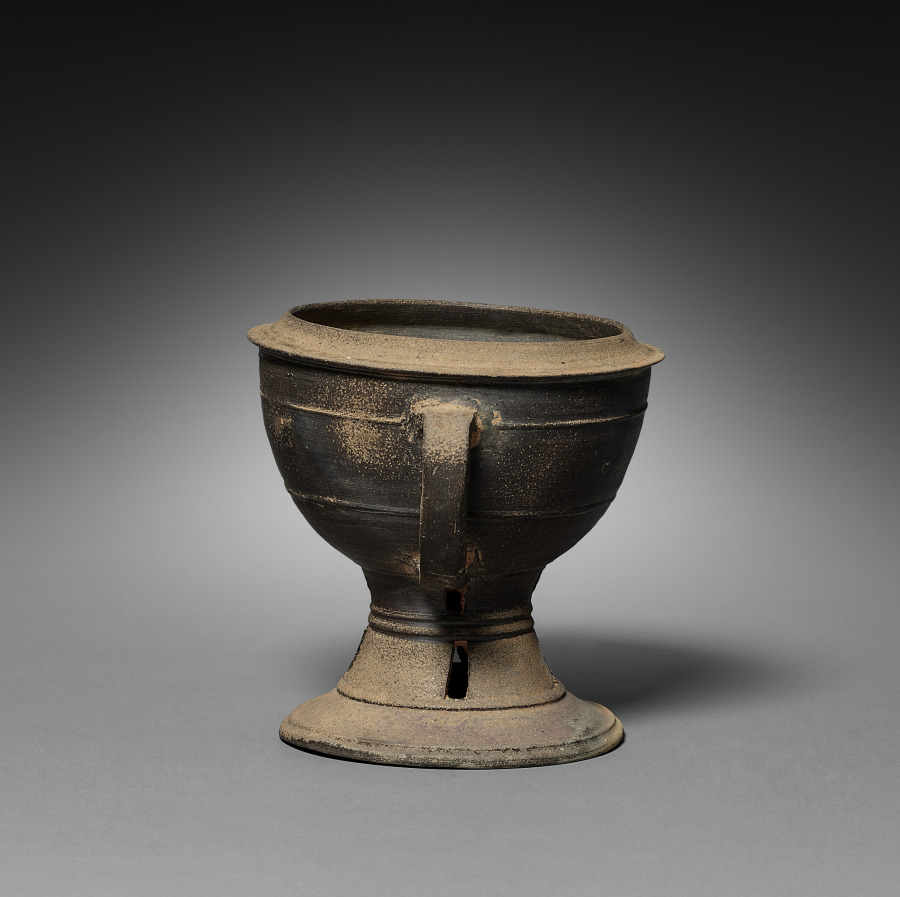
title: Lidded Cup with Strap Handles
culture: Korea, Gaya period (42–562 CE)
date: 300s–400s CE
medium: stoneware with natural ash glaze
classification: Ceramic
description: Pottery vessels with a footed stand such as this one is the earliest known high-fired ware. Its gray color is the result of the reduction of oxygen in the closed kiln chamber. Footed vessels were not for everyday usage, but rather served to present offerings to the deceased.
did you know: A series of triangular cutouts shown on the bottom are standard features of Kaya pottery.